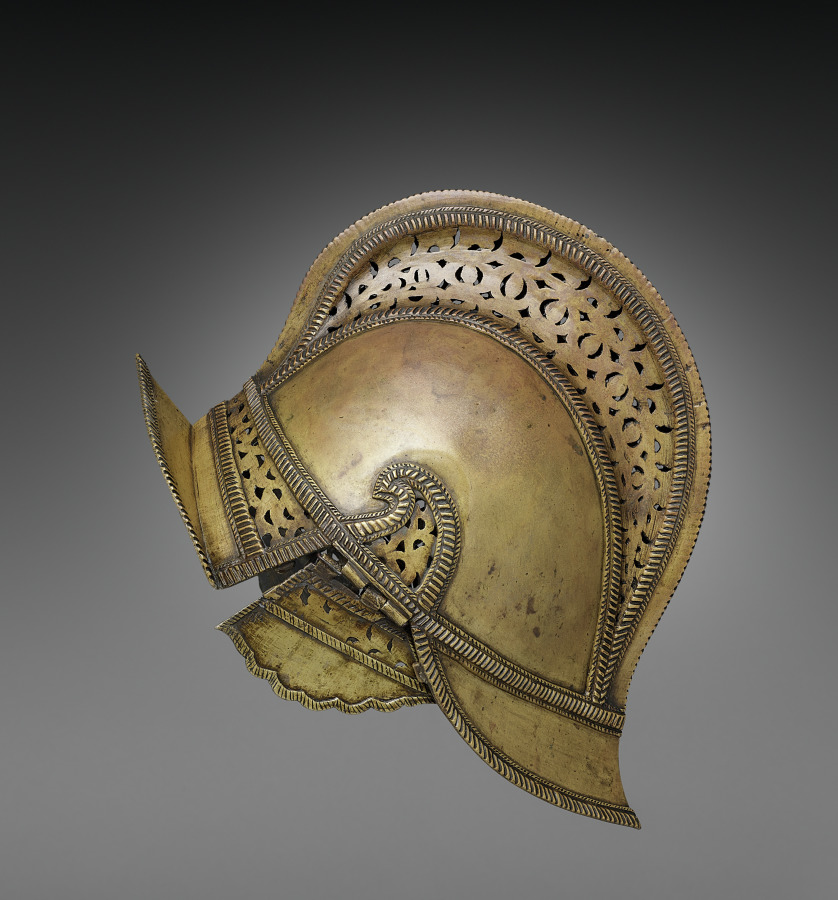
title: Helmet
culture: Philippines, Mindanao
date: 1800s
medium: Brass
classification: Arms and Armor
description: The predominantly Muslim Maranao people of the southern Philippines developed a rich material culture—including brass work, textiles, weaponry, and architecture—commonly featuring a curvilinear, geometric ornament known as okir. This helmet, while based on Spanish types, features filigree vents and openwork embellishment that are distinctively Mindanao. The top might once have been decorated with feathers or other ornaments.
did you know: Bacolod, the traditional homeland of the Maranao people, is a historic pangampong (fortified settlement) on Lake Lanao.